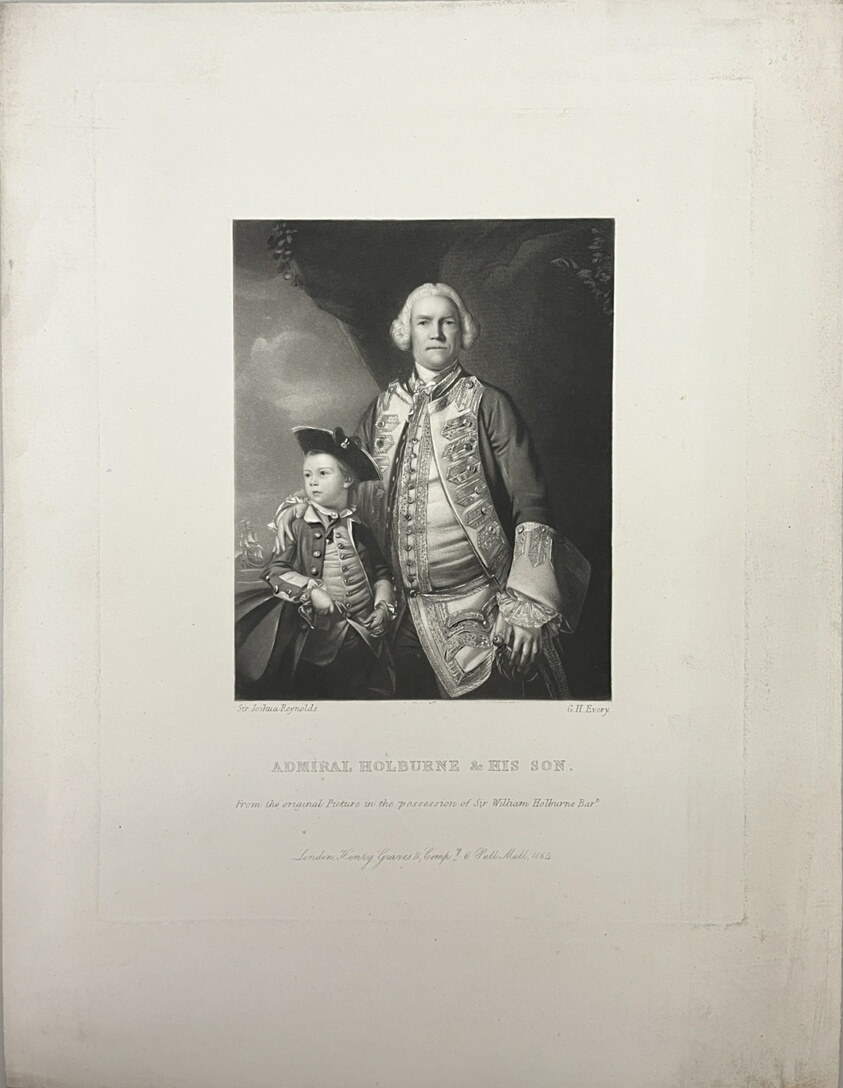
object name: Print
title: Admiral Holburne and his son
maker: George H. Every (British, 1837-910); after Joshua Reynolds (British, 1723-1792)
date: 1864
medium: Etching and aquatint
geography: United Kingdom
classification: reproduction; print; prints and drawing